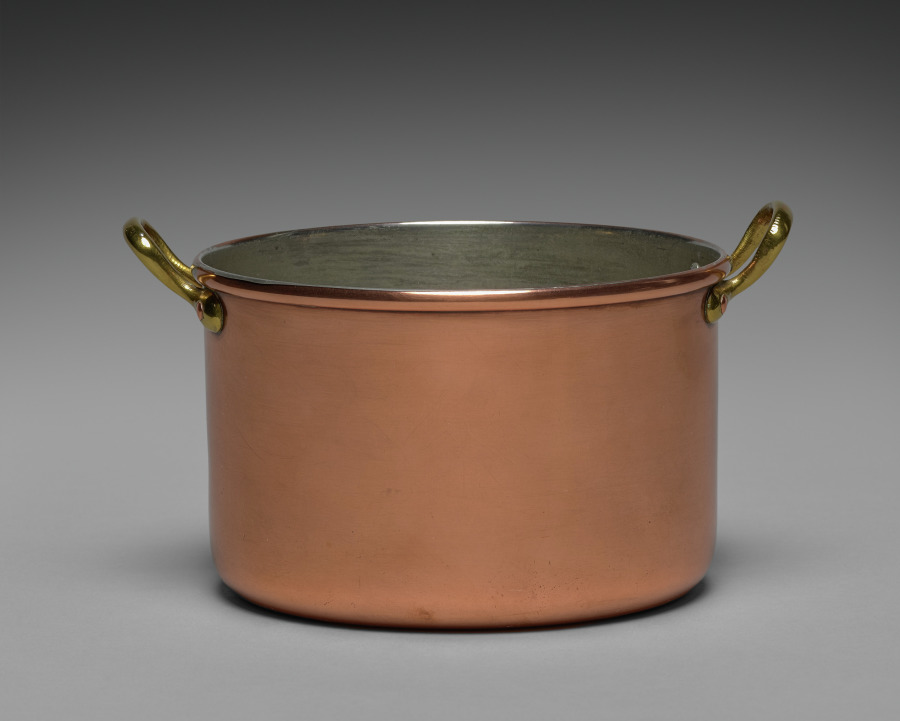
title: Pot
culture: Russia, St. Petersburg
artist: firm of Peter Carl Fabergé (Russian, 1846–1920)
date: 1914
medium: copper with brass handles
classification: Metalwork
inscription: inscribed: War (in Cyrillic), 1914r.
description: As Russia entered the First World War, austerity and economy settled into the fabric of life even among wealthy aristocrats and nobility. Not only were precious materials such as gold, silver, and gemstones hard to procure, but such luxury seemed out of place when so many men were dying at the front. Fabergé contributed to the war effort by making shells, casings, and other munitions out of brass and copper. He also made cookware, such as this small soup pot, to be sent to the front lines with provisions tucked inside. However, these simple forms only looked affordable. They were still a luxury only the wealthiest families could afford to send to their sons.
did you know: This copper soup pot was sent to the front lines filled with provisions during the First World War.